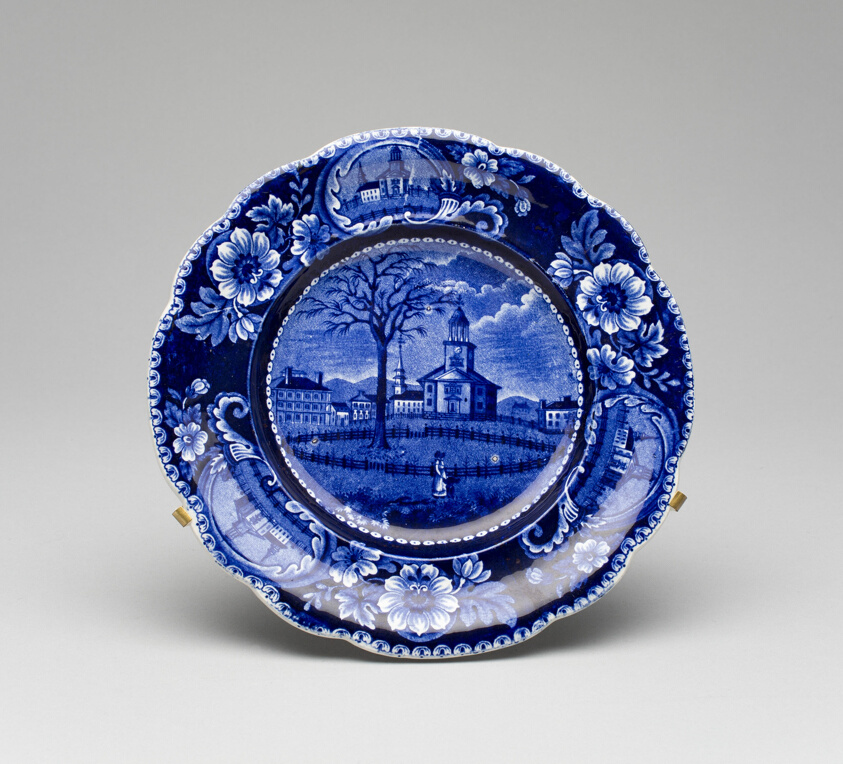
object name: Decorative Arts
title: Plate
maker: James and Ralph Clews; English, active 1818–36; Made for the American market; West Midlands, Stoke-on-Trent, England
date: 1827–36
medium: Earthenware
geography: England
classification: plate (general, dish); earthenware; dish (vessel); american decorative arts; ceramics; decorative arts